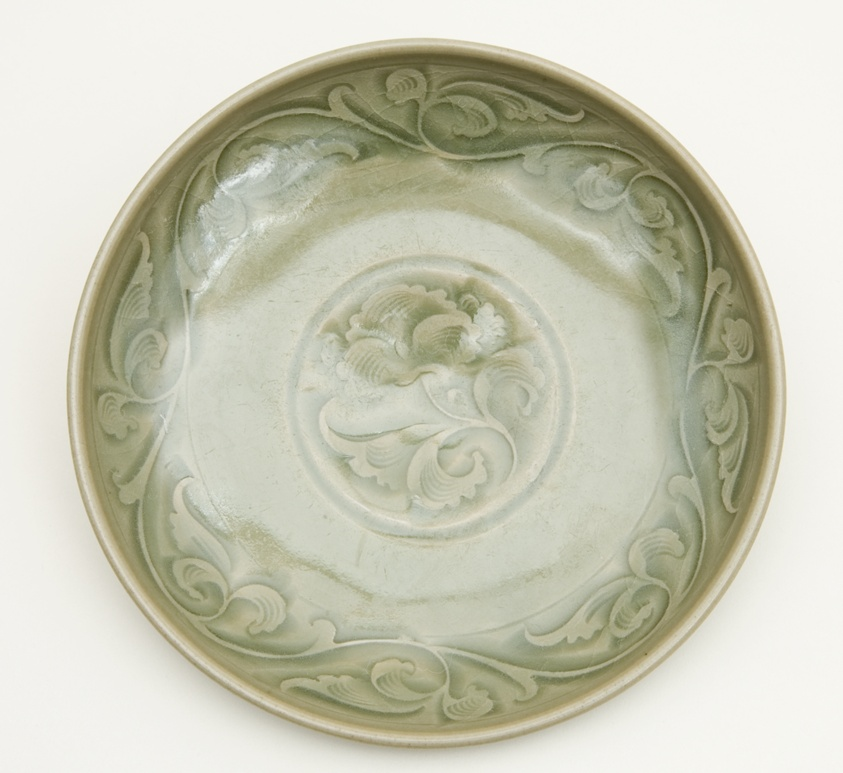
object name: Vessel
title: Dish with Undulating Peony-Leaf Scrolls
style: Chinese (culture or style)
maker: China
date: Northern Song dynasty (960–1127)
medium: Yaozhou ware; stoneware with underglaze carved and combed decoration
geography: China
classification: dish (vessel); vessel